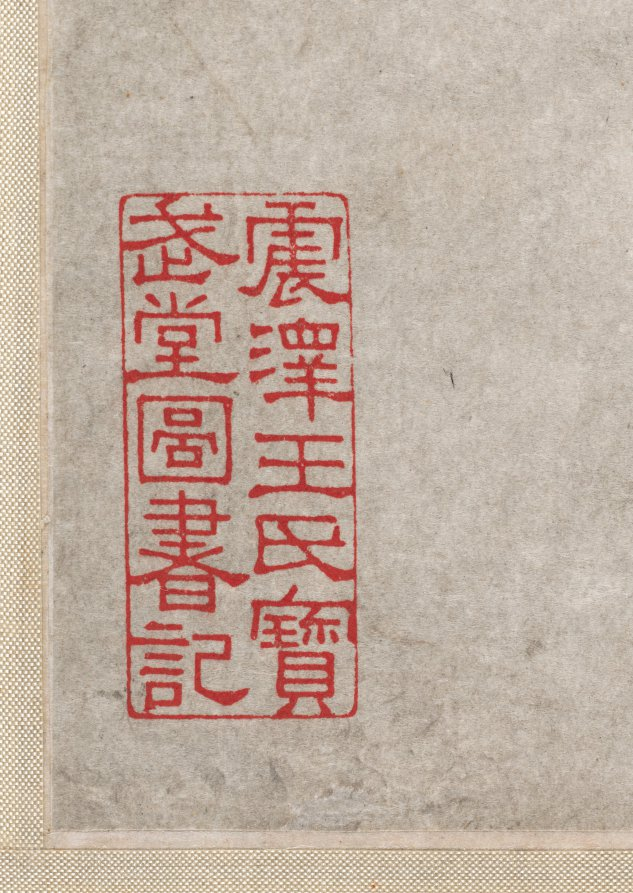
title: Mountain Village Embraced by the Summer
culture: China, Qing dynasty (1644-1911)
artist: Wang Shimin (Chinese, 1592–1680)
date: 1659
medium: hanging scroll, ink on paper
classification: Painting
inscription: Artist's inscription, signature, and 3 seals: [seal] Ouxie 偶諧. In the jihai year [1659], the fourth lunar month, I painted this for T'o-weng, my senior in our literary club, for your amusement and correction. Your junior Wang Shimin. [seals] Wang Shimin yin 王時敏印; Xunzhi 遜之.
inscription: 2 additional seals: 1 of Jiang Gusun [Chiang Ku-sun] 將穀孫 (20th century); 1 of C. C. Wang 王季遷 (1907–2003).